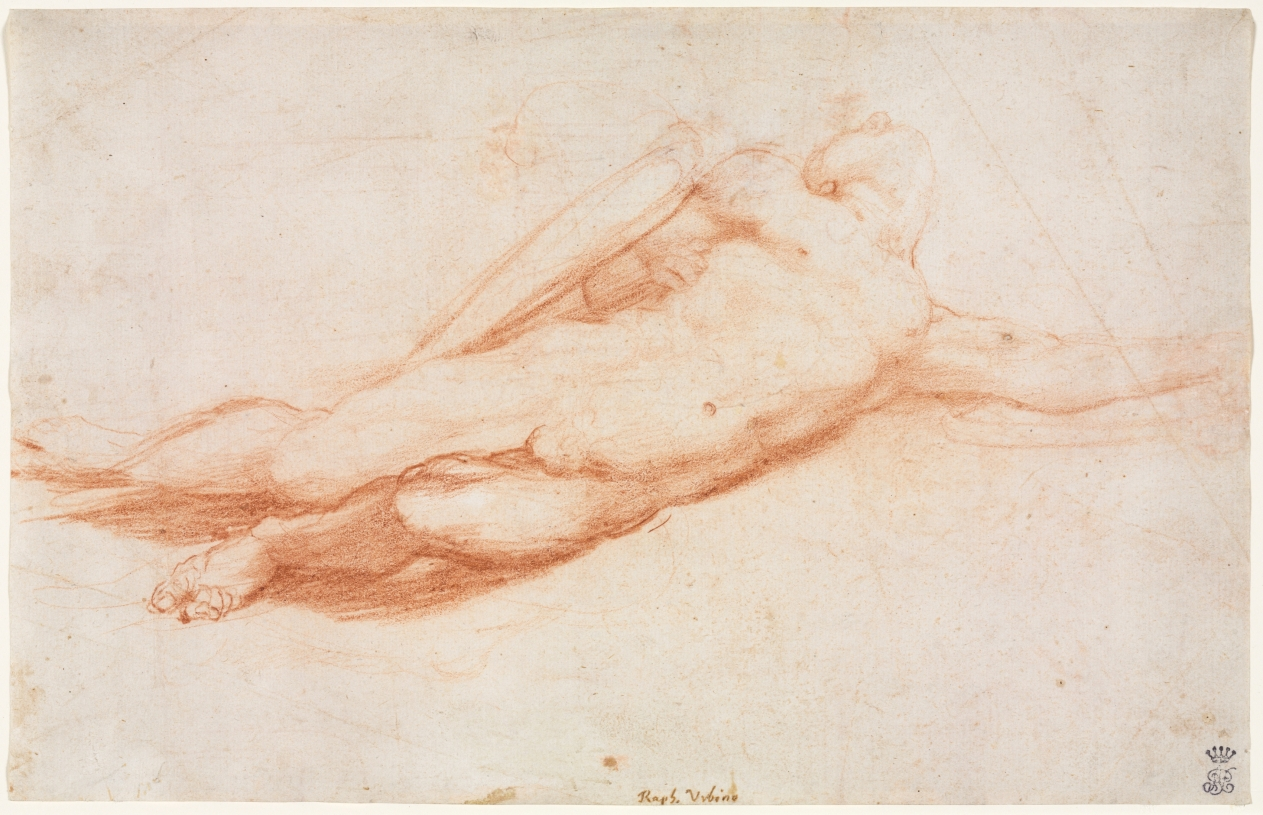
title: Study of a Fallen Soldier (possibly the Conversion of Saul) (recto)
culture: Northern Italy, Emilia, first half 16th Century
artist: attributed to Correggio (Italian, 1489?-1534)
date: c. 1525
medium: red chalk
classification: Drawing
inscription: in brown ink, lower center: Raph. Urbino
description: In this chalk study of a lone, fallen soldier, the brown ink inscription at the bottom of the sheet indicates that at one time it was believed to be by Raphael. However, it is now attributed to Correggio based on the sensuous drawing style that focuses attention on some details, like the soldier’s leg and foot, while other contours are barely sketched and shaded. The back, or verso, of the sheet presents quick sketches of classical-style architecture and a woman with a quiver of arrows on her back; she may be an Amazon, one of a race of warrior women skilled in archery, or Diana, goddess of the hunt.